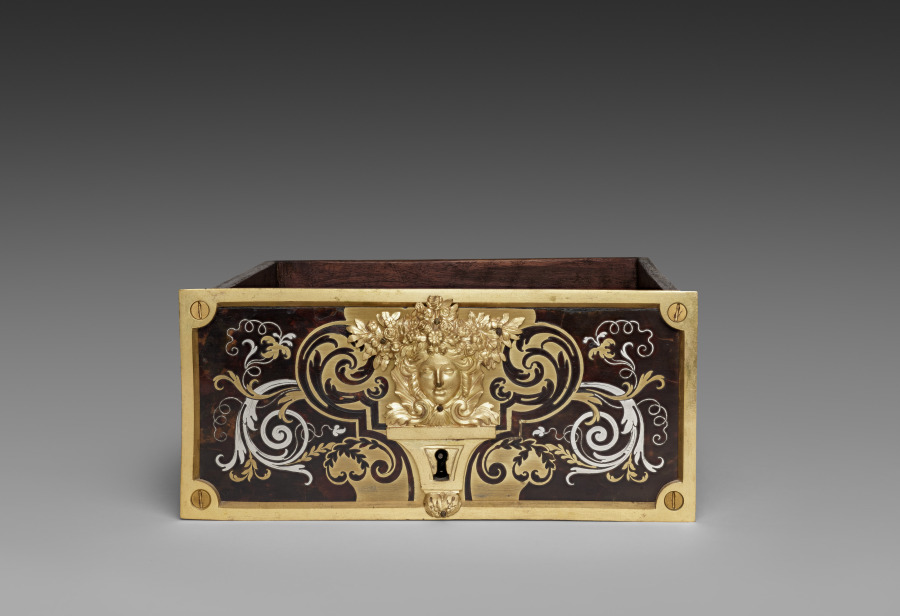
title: Side Drawer for Cabinet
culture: France, late 17th Century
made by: André-Charles Boulle (French, 1642–1732)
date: c. 1690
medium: ebony, marquetry in metal and tortoise shell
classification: Furniture and woodwork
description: Appointed cabinetmaker to King Louis XIV in 1672, André-Charles Boulle became a master of furniture making in France during the late 1600s until his death in 1732. Known primarily for his use of marquetry, in which metal patterns are inlaid into tortoiseshell then applied within the veneered surface of the furniture, Boulle established a level of quality and craftsmanship few others could achieve. As a result, his work found favor at the royal court and among other aristocrats and diplomats eager to impress the king. The inclusion of a medallion depicting Louis XIV within the bronze decoration of this chest would have identified the owner with the royal court. Often exhibiting stout architectural proportions with elegant groups of inlaid motifs such as the parrot on the central panel of this chest, Boulle’s designs are an example of the intellectual fashion for contrasting ideas, materials, and motifs.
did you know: Originally designed to sit atop an elaborate tall stand, this chest was likely altered in the late 1700s to reduce its scale and height.